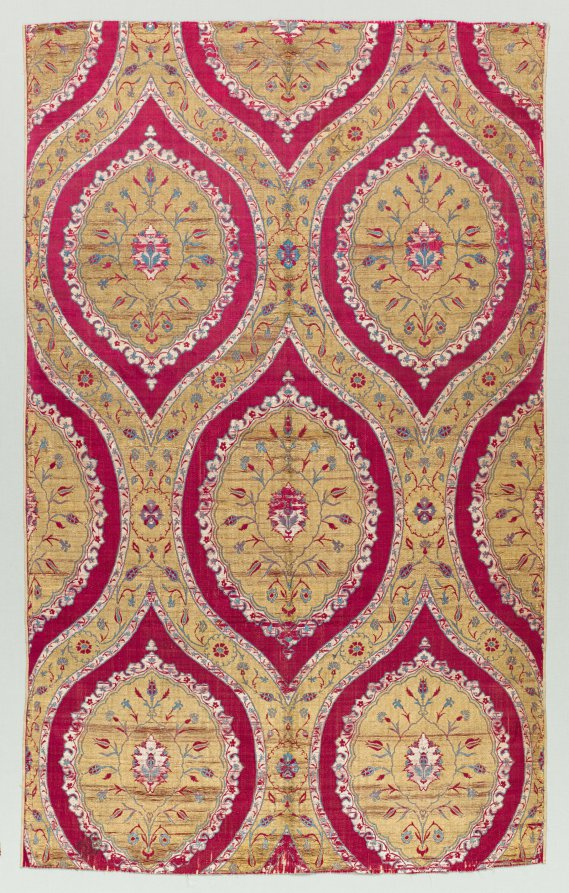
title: Lampas with floral medallions in ogival lattice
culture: Turkey, Istanbul or Bursa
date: 1550–75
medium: Silk and gilt-metal thread; lampas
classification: Textile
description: This signature Turkish brocaded silk has a classic elegance associated with the artistic height of the 1500s. The prominent golden medallions and ogival (curved) lattice contrast with exceptionally delicate Turkish flowers—tulips, roses, carnations, and hyacinths—which all grow on a single vine. The symmetrical design and two complete medallions with lattices across the width are typical Turkish features of fine brocaded silks. Its original function is uncertain. Possibly it was intended for an imperial kaftan, a garment consisting of a long gown with sleeves reaching below the hands, examples of which are preserved in the Topkapi Palace in Istanbul, the imperial center of the vast and wealthy Ottoman Empire.